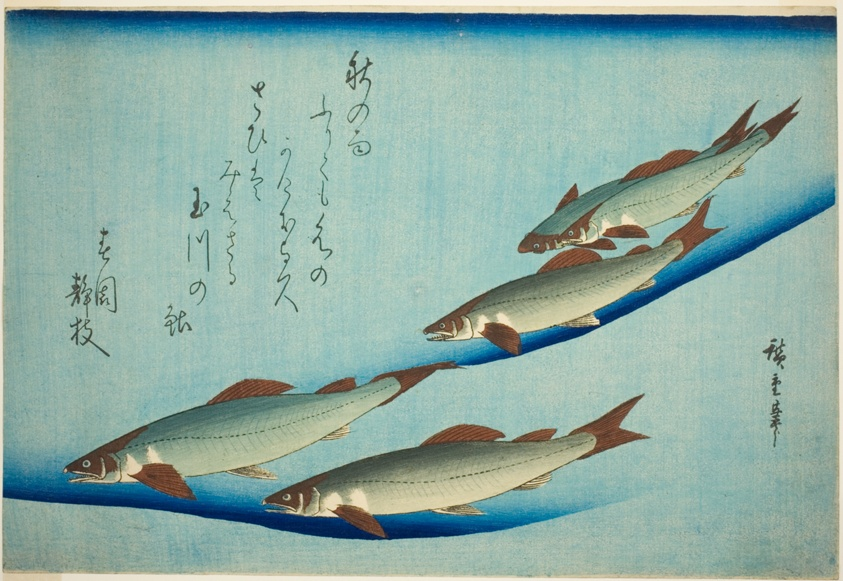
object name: Print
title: River trout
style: Japanese (culture or style)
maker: Utagawa Hiroshige 歌川 広重; Japanese, 1797-1858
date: c. 1832/44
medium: Color woodblock print; oban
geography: Japan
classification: woodblock print; print; asian art